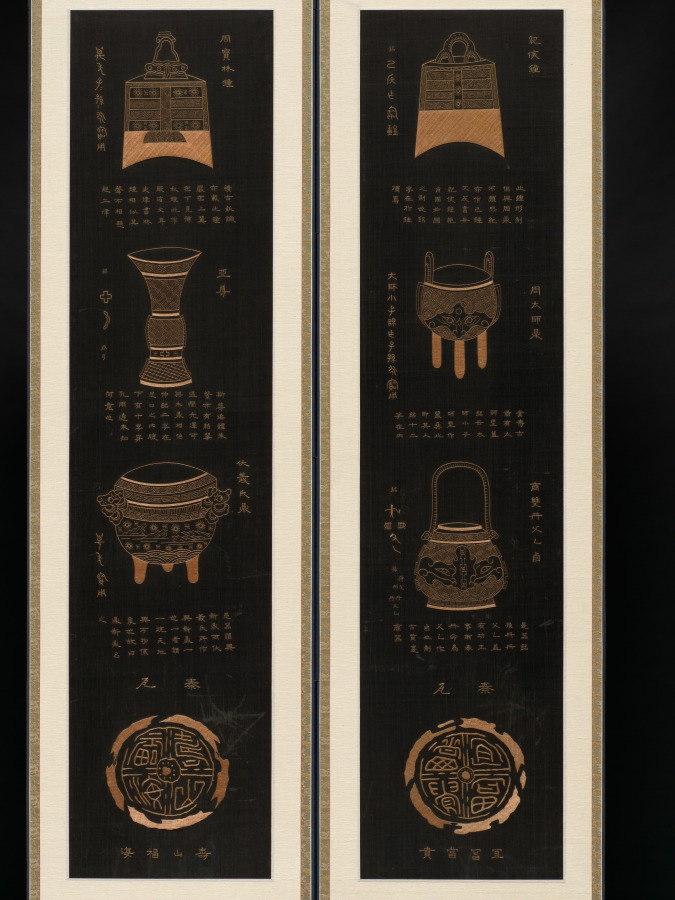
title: Ancient Chinese Bronzes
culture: Korea, Joseon dynasty (1392–1910)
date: late 1800s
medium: Ten-panel folding screen; embroidery, gold silk threads on black silk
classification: Textile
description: This embroidered folding screen depicts a set of bronze vessels. While the subject of bronze vessels is part of mainstream male elite culture, which centered on ancestral rituals, the written text that accompanies each bronze vessel expresses the idea of evoking good fortune and wishing for many children. The is perhaps related to the idea that those who diligently perform rituals for the spirit of ancestors could have all their aspirations realized.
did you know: The written text that accompanies each bronze vessel depicted in this embroidered screen expresses the idea of evoking good fortune and wishing for many children.